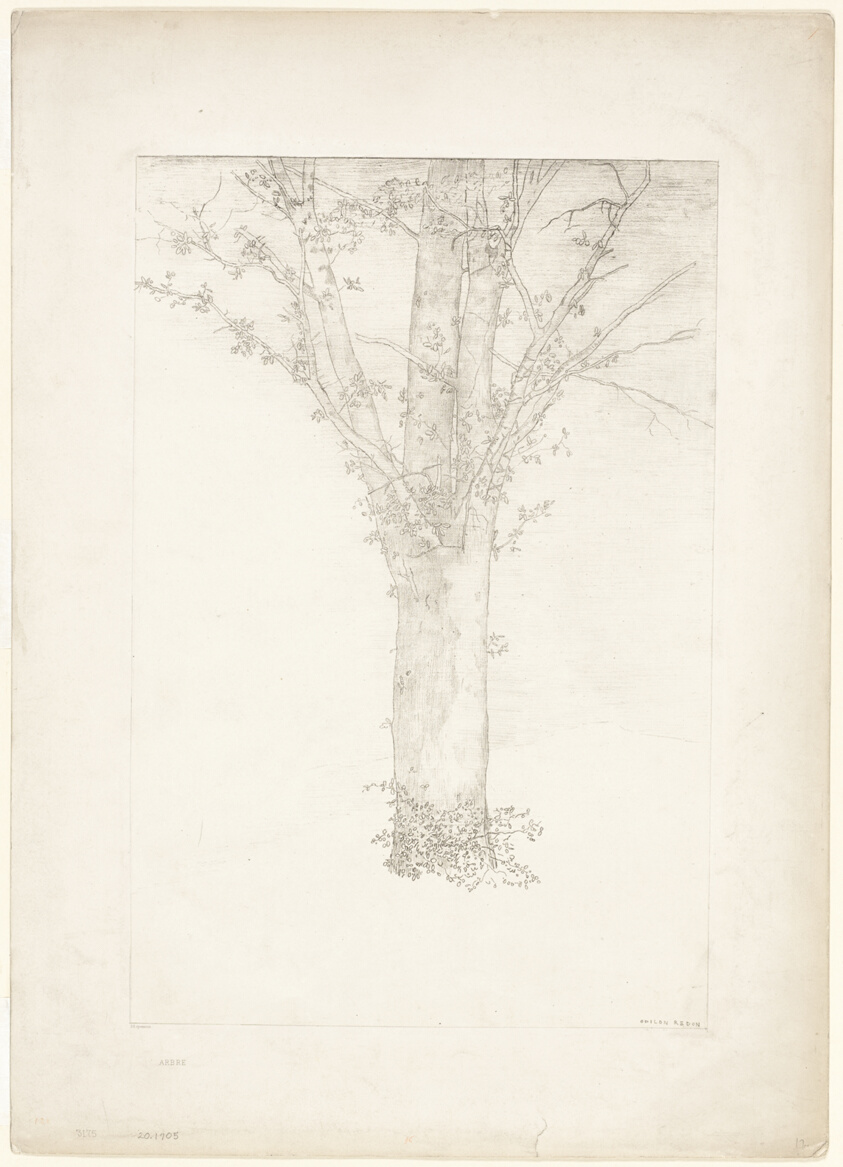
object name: Print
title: Tree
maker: Odilon Redon (French, 1840-1916)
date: 1892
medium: Lithograph in black on cream China paper laid down on ivory wove paper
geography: France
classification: lithograph; print; prints and drawing; paper